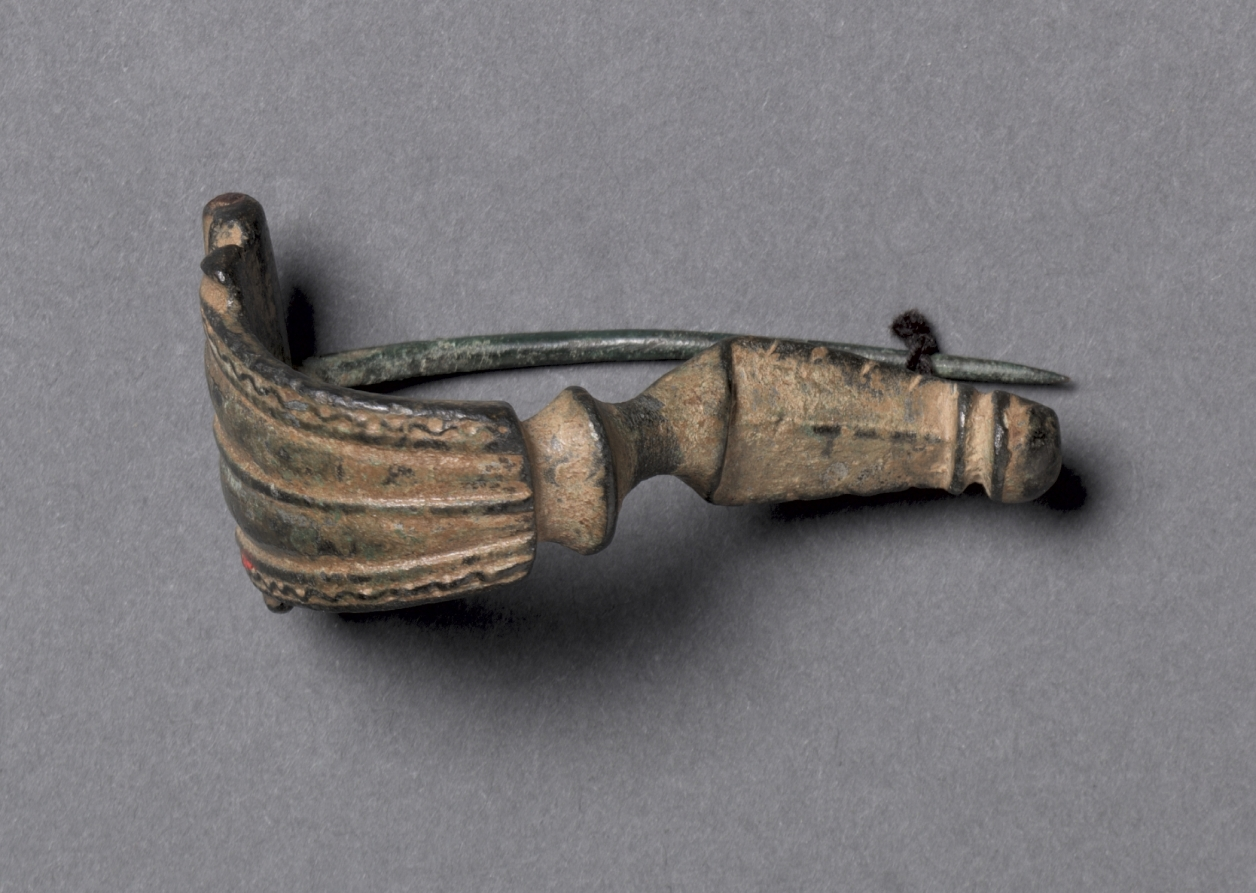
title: Fibula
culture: Etruscan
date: c. 100 BCE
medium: iron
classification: Jewelry